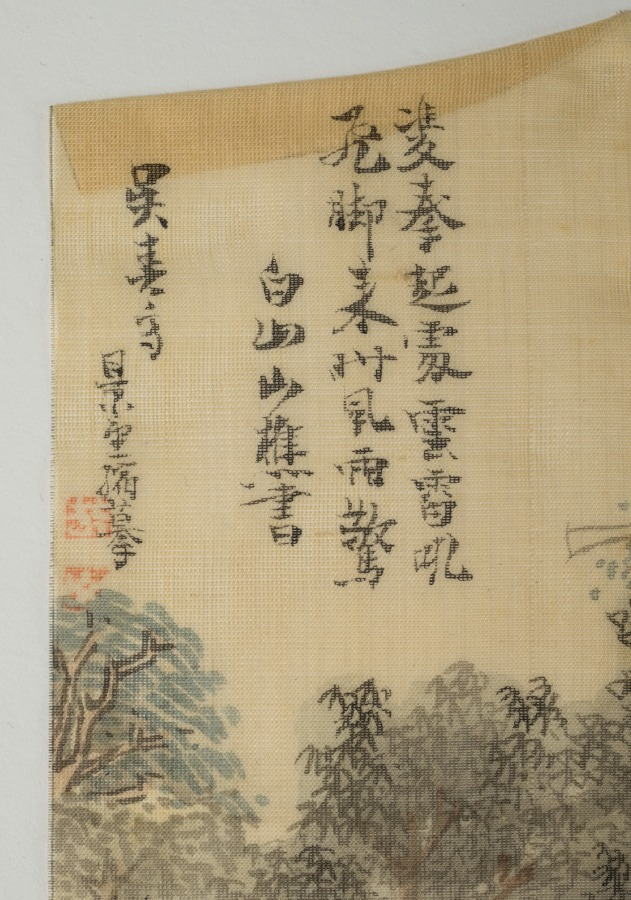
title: Happy Forest, from Water Margin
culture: Japan, Edo period (1615–1868)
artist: Matsumura Goshun (Japanese, 1752–1811)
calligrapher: and Amenomori Shōteki (Japanese, 1731–1786)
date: late 1700s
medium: hanging scroll; ink and color on paper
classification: Painting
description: The Chinese literary classic Water Margin is set in the 1120s and tells the story of 108 outlaws who first rebel against the government and then join forces with it. This painting depicts an episode in which hero Wu Song reclaims the tavern Happy Forest for its rightful owner, the prison warden’s son, Shi En. To prepare for the fight, Wu Song drinks a lot of wine. The painting was inscribed with a quote in which an ally describes Wu Song’s fighting style. It reads as follows: Where his twin fists rise, clouds and thunder roar, When his flying kick comes, wind and rain tremble.